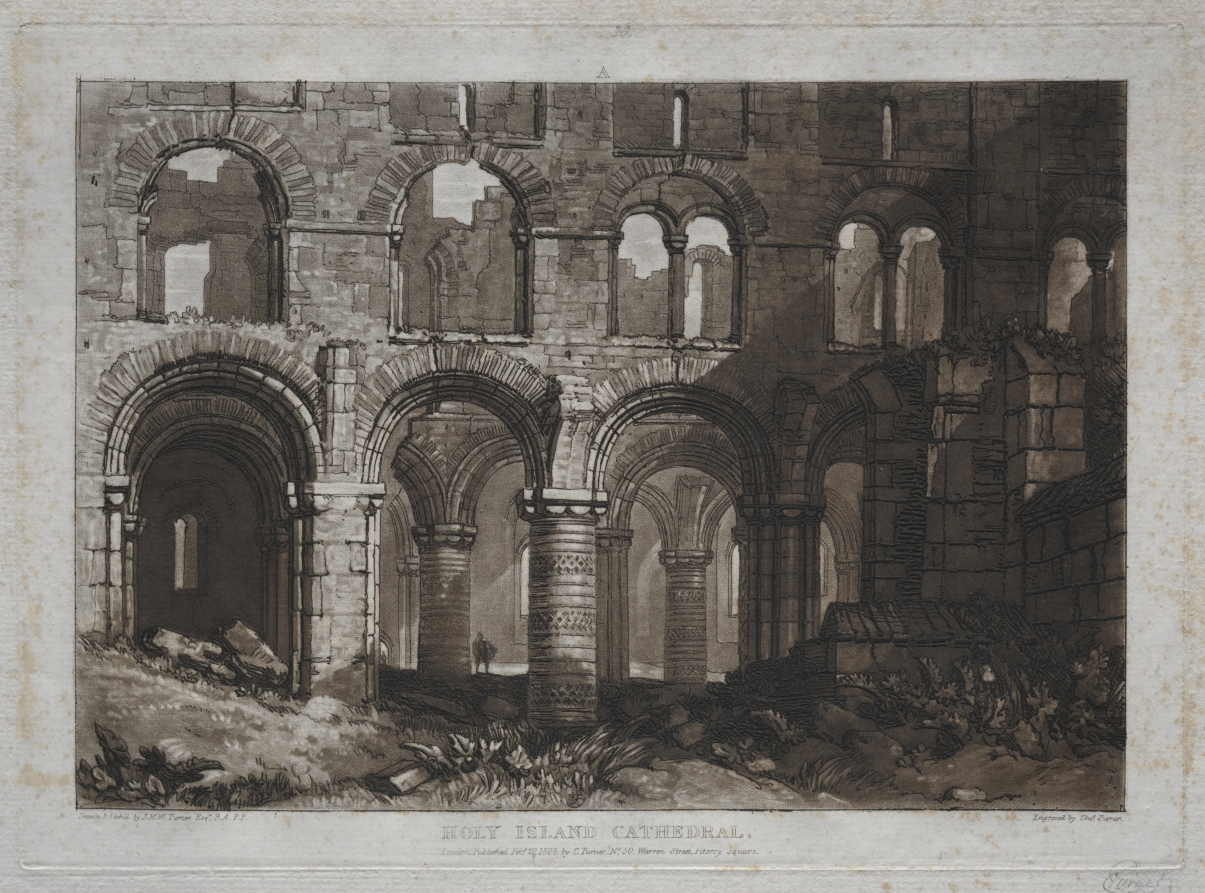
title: Liber Studiorum: Holy Island Cathedral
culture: England, 19th century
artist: Joseph Mallord William Turner (British, 1775–1851)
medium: etching and mezzotint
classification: Print